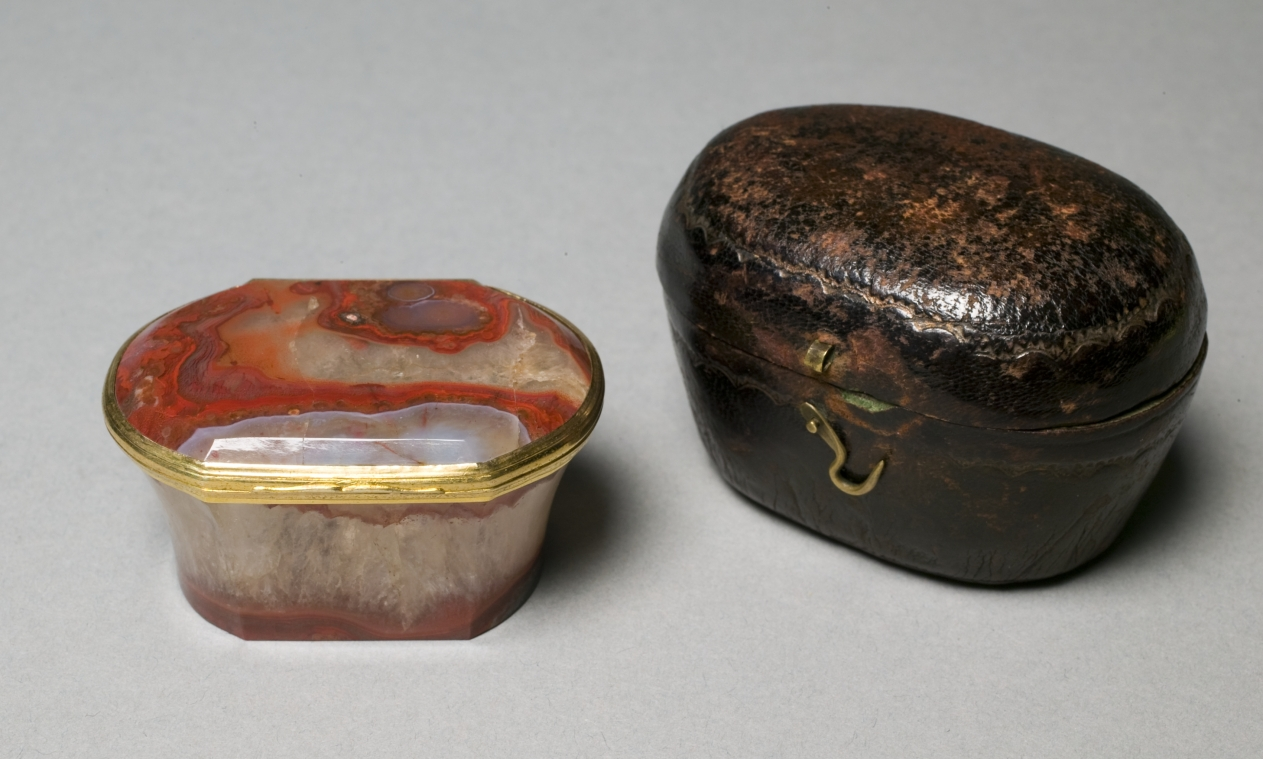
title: Snuff Box and Original Case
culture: 18th century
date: c. 1750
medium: gold mounted agate with original leather case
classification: Miscellaneous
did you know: The designer Bernard Moore studied Asian and Islamic ceramics. He was especially interested in glazes like the vivid red one on this vase that resembles the color of oxblood.